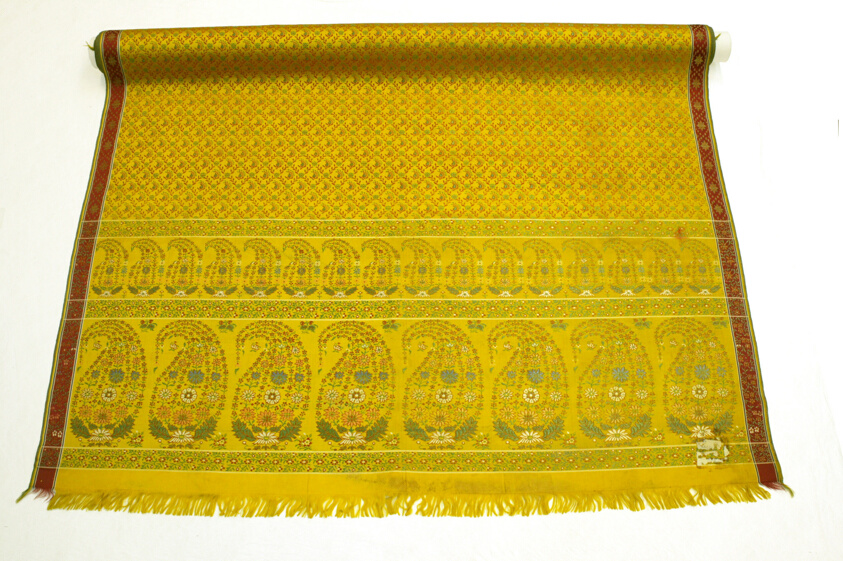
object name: Costume and Accessories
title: Sari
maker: India, Tamil Nadu, Ayyampettai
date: 1820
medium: Silk and cotton, compound satin weave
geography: India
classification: textile; weaving; costume; sari (garment); dress (garment); clothing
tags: paisley, yellow (color), red (color), green (color), foliage, flowers, diamond shapes